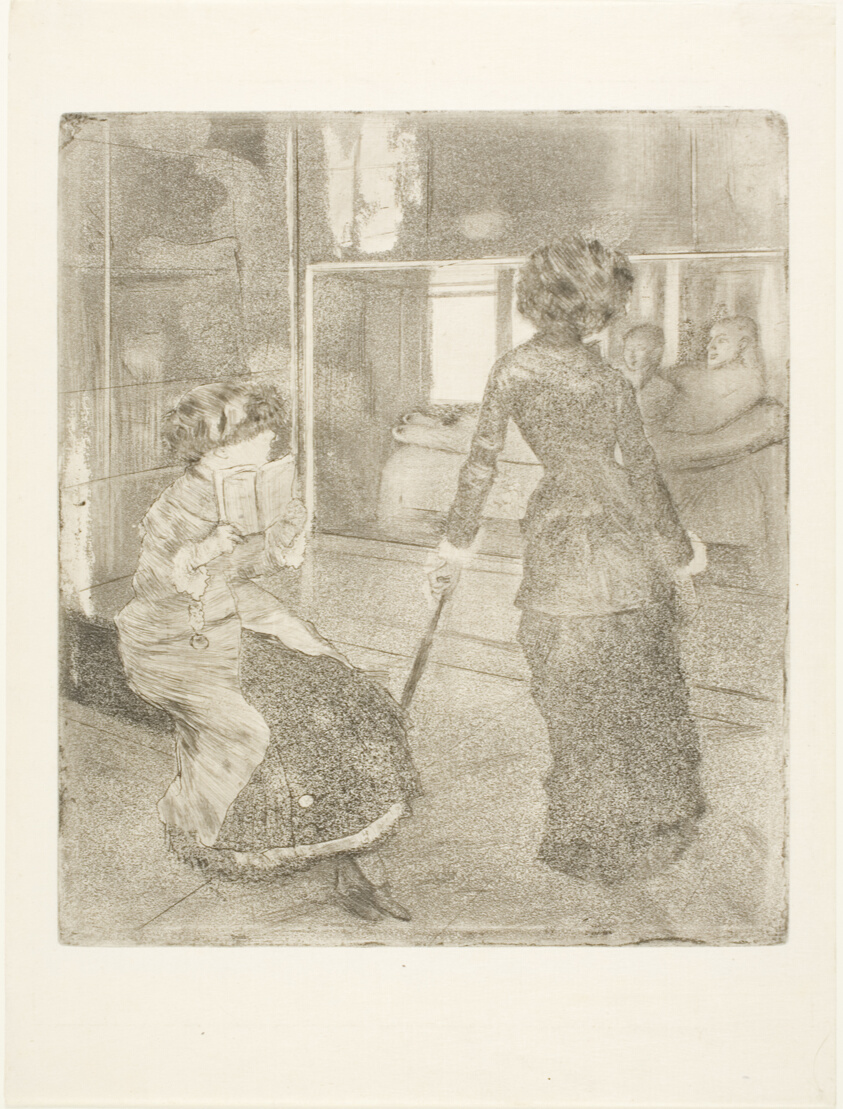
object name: Print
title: Mary Cassatt at the Louvre: The Etruscan Gallery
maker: Edgar Degas; French, 1834-1917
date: 1879–80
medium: Soft ground etching, drypoint, aquatint, and etching on cream Japanese paper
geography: France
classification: etching; print; prints and drawing; paper